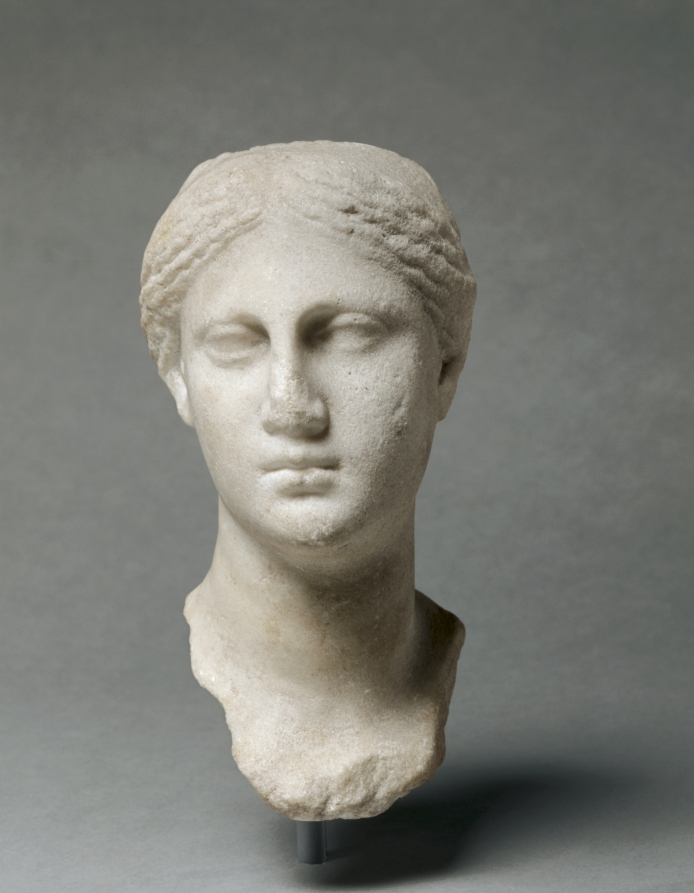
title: Head of a Woman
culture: Greece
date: 400–200 BCE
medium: marble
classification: Sculpture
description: This marble bust of a woman is rendered with the soft, delicate features typical of Greek sculpture of the late fourth and early third century BCE. Her features nearly disappear into the smooth landscape of her face, each curve fading softly into the next. Her hair is held away from her forehead in a series of tight braids pulled back to a bun, now mostly lost.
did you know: Though this hairstyle is often associated with sculptures of Aphrodite, it was also a popular style among mortal Greek women.